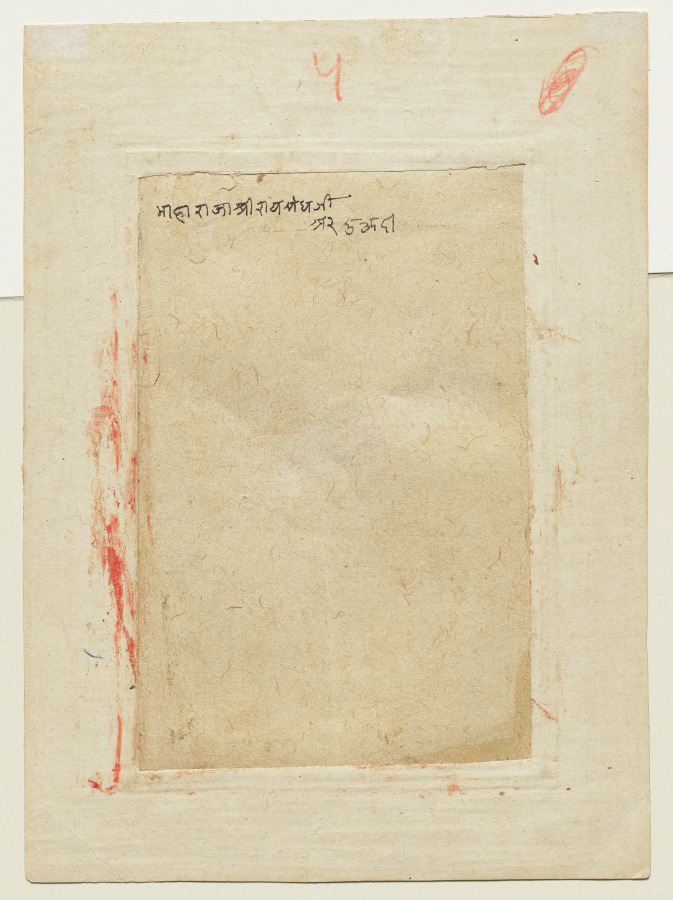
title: Portrait of Maharaja Rai Singh of Bikaner (reigned 1574–1612)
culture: Northwestern India, Rajasthan, Rajput Kingdom of Bikaner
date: c. 1610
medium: Gum tempera and gold on paper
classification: Painting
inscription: handwritten inscription identifying the subject, on the verso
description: The portly Rajput king wears a long, belted tunic tied under the left arm—the custom of most Hindus. His berry-hued garments stand in pleasing contrast against the teal green background that references the lushness of paradise. Though the artist is unidentified, the naturalistic sensitivity of the portrait and delicacy of the garments imply the work of a master court painter, probably following a model by Nur Muhammad. Rai Singh had an illustrious career serving his overlord the Mughal emperor Akbar (reigned 1556–1605), and his daughter was married to Akbar’s son, Jahangir (reigned 1605–27).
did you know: This painting is based on a drawing also in the CMA collection (1987.1100).